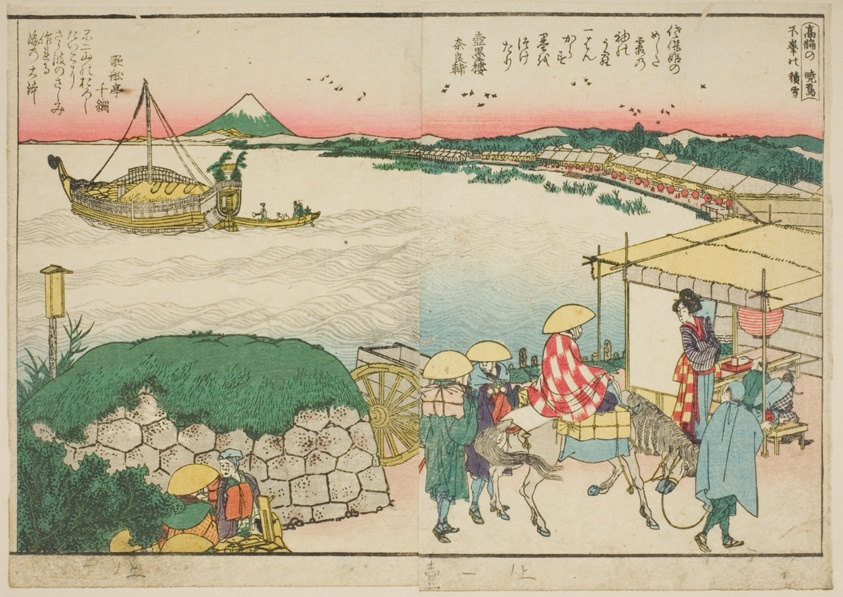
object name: Print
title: Pages from the illustrated book "Panoramic Views along the Banks of the Sumida River (Ehon Sumidagawa ryogan ichiran)"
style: Japanese (culture or style)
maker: Katsushika Hokusai 葛飾 北斎; Japanese, 1760-1849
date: 1801, 1804, or 1806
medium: Color woodblock print; double-page illustration from book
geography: Japan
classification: woodblock print; print; asian art